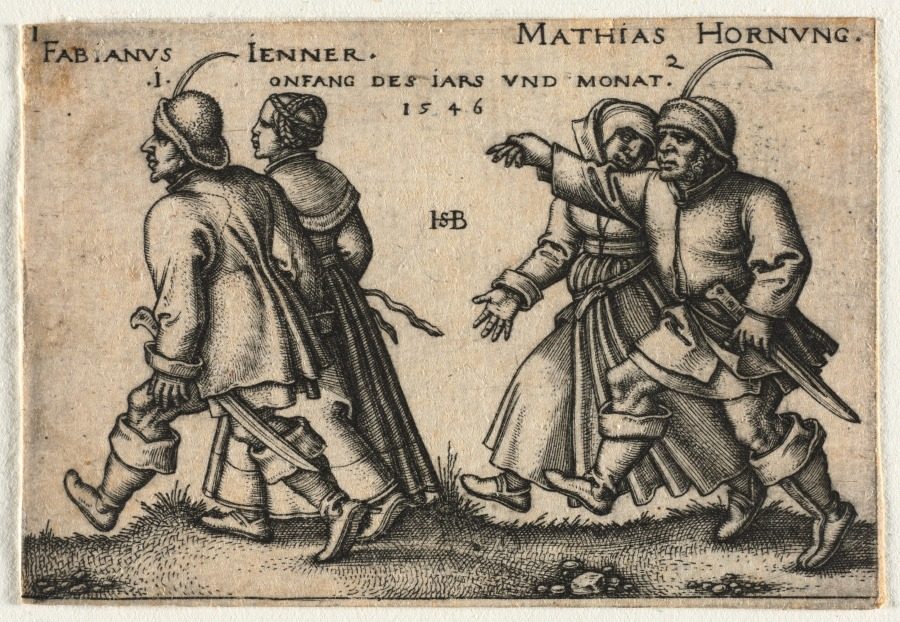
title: The Peasant Wedding or the Twelve Months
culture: Germany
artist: Hans Sebald Beham (German, 1500–1550)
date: 1546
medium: engraving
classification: Print